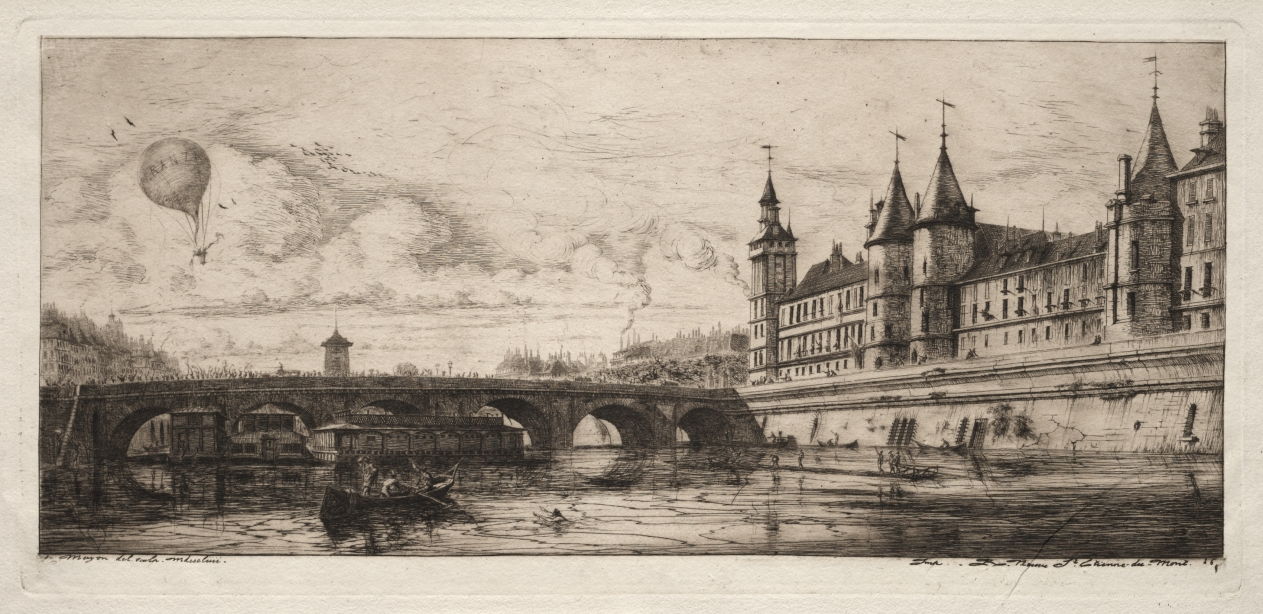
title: Etchings of Paris: The Exchange Bridge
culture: France, 19th century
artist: Charles Meryon (French, 1821–1868)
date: 1854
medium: etching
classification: Print